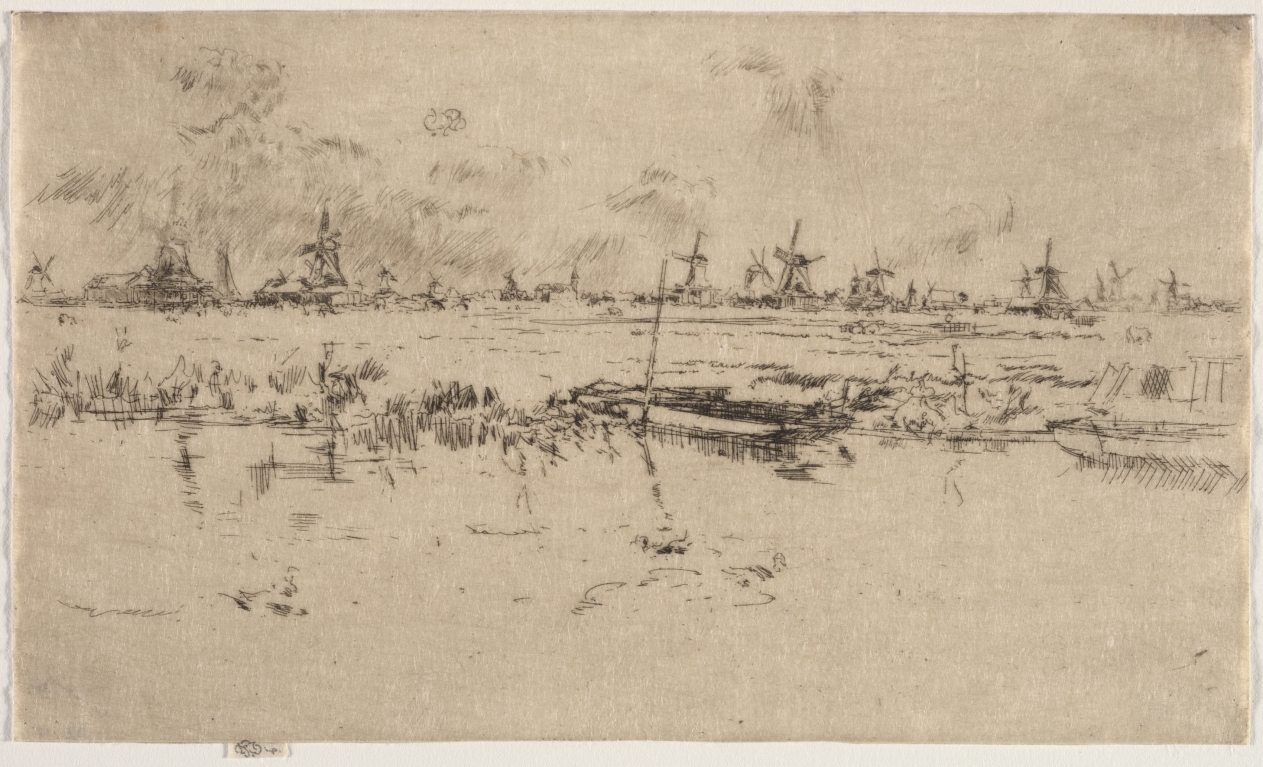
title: Zaandam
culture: America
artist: James McNeill Whistler (American, 1834–1903)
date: 1889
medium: etching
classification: Print